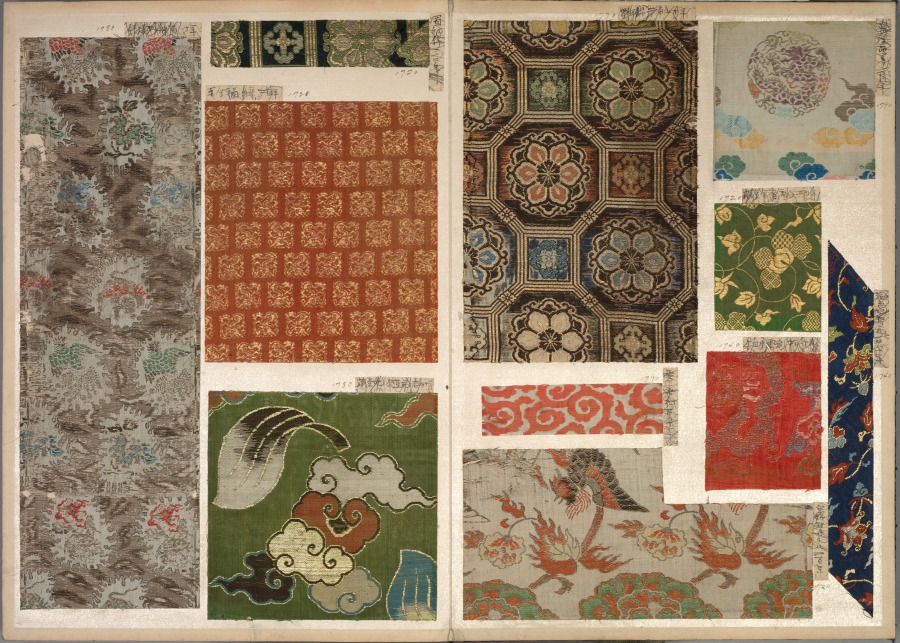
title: Album of Textile Samples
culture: Japan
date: 1790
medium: silk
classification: Textile